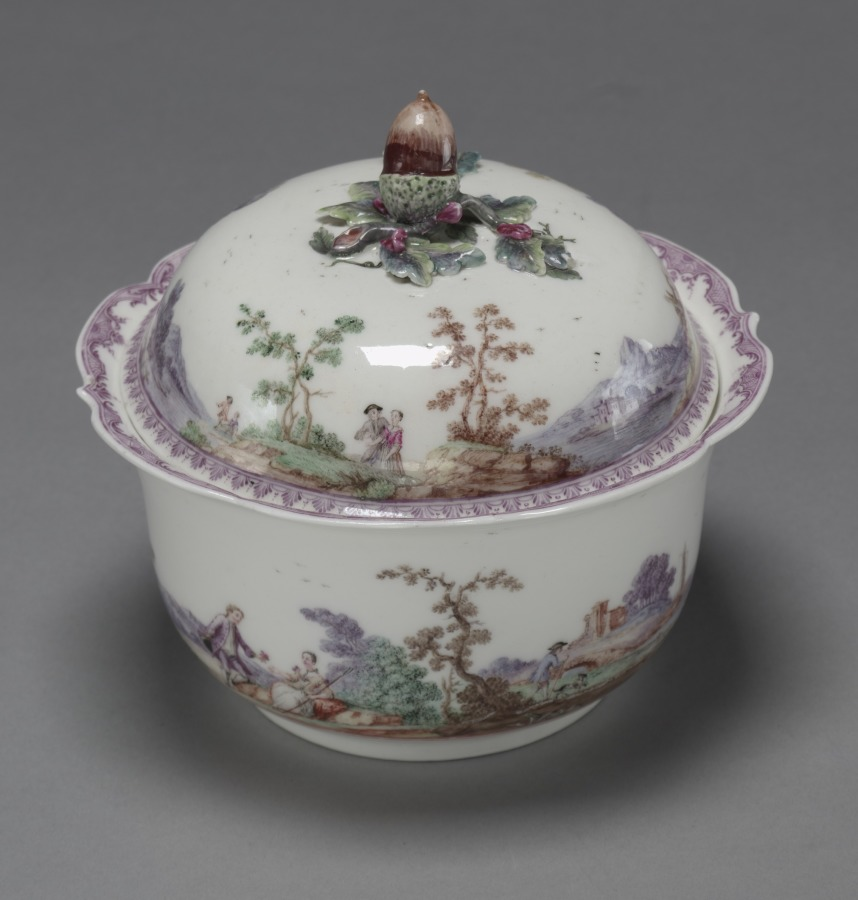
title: Covered Sugar Bowl (Pot à sucre)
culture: France, Vincennes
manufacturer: Vincennes Porcelain Manufactory (French, 1740–1756)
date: 1745–48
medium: soft-paste porcelain with enamel decoration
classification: Ceramic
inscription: In red on bottom of bowl: P.M. In red on interior of lid: P.M. 16 4.8B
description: This covered bowl, likely intended for sugar, is one of the earliest surviving examples of Vincennes porcelain, a reputed French factory moved to Sèvres in 1756. The continuous landscape is painted on this object en pointillé, a method by which a painter forms images with tiny dots. This style may have been influenced by their German competitors at the Meissen Porcelain Factory.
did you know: Three separate shades of purple, one of the most expensive colors to produce on porcelain during this time, are used extensively in this object’s paintings.